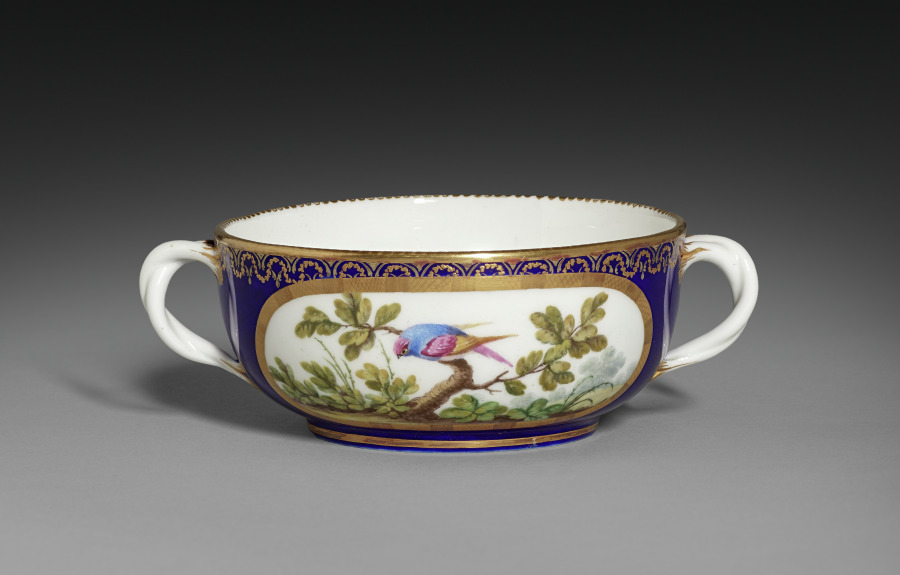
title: Broth Bowl (Écuelle Ronde)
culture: France, Sèvres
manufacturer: Sèvres Porcelain Factory (French, est. 1756)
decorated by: François-Joseph Aloncle (French)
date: 1772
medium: soft-paste porcelain with enamel and gilt decoration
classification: Ceramic